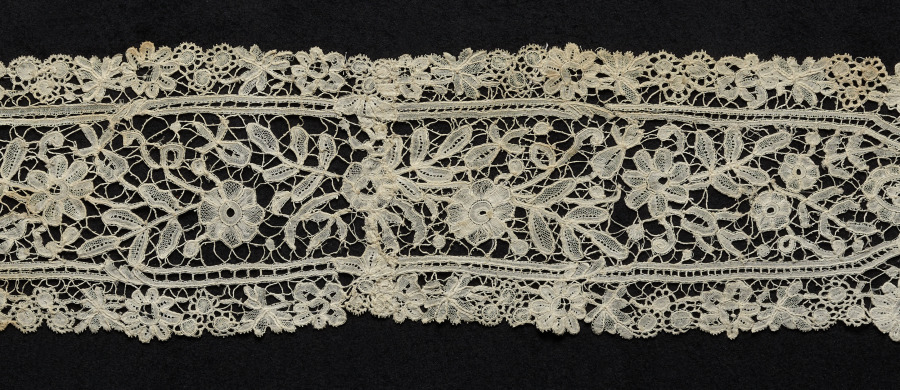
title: Lace Lappet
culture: Belgium, Brussels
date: 1880–99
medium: Linen: bobbin lace (Duchesse)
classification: Lace